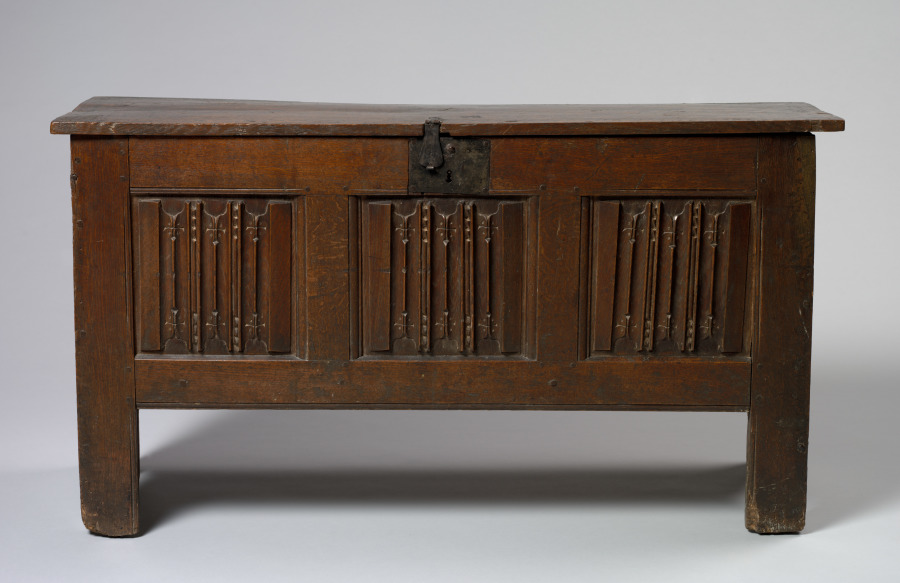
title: Chest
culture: England, late 15th - early 16th centuries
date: c. 1490–1520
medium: oak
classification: Furniture and woodwork